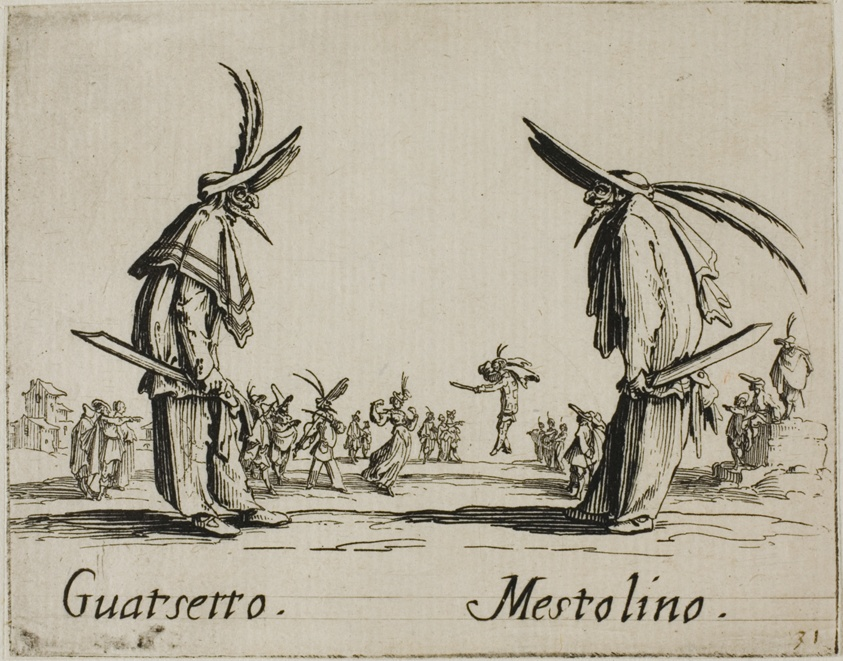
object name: Print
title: Guatsetto - Mestolino, plate 5 from Balli di Sfessania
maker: Jacques Callot (French, 1592-1635)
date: c. 1622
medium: Etching and engraving on paper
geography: France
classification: etching; print; prints and drawing